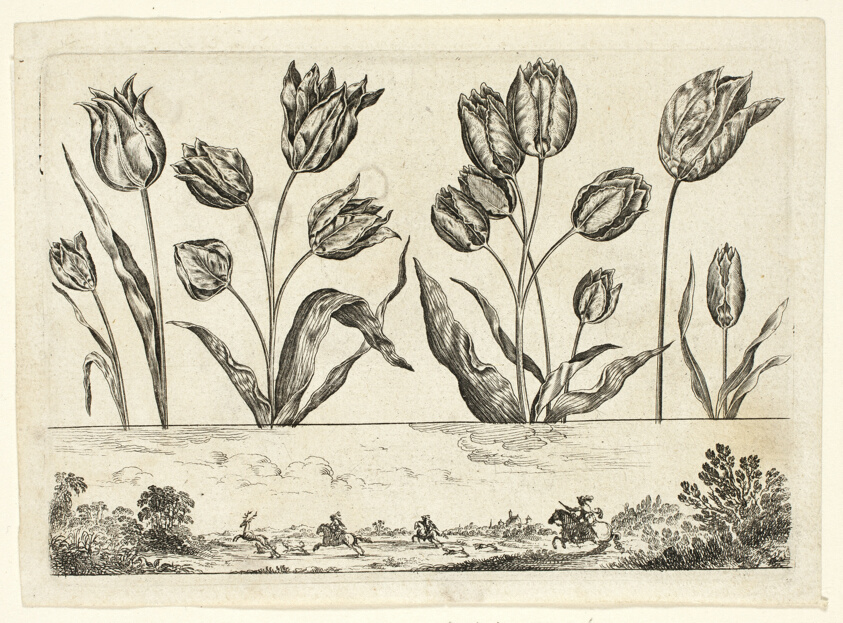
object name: Print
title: Flowers and Hunting Scene, from Livre Nouveau de Fleurs...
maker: Nicolas Cochin (French, 1610-1686); published by Balthasar Moncornet (French, c. 1600-1668)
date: 1645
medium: Etching in black on ivory laid paper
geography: France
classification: engraving; print; prints and drawing